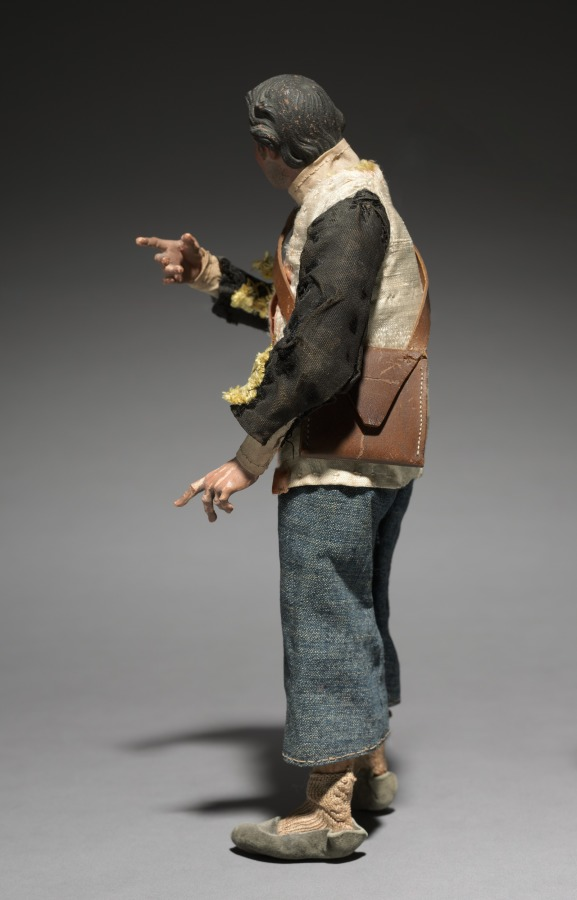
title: Figure from a Crèche: Standing Man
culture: Italy, Naples, late 18th-early 19th century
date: 1780–1830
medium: painted wood and terracotta with various textiles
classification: Sculpture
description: The practice of creating scenes of the Nativity for the home dates from the early 1700s in Italy, where people began to set up doll-like figures of about a foot or less in height. The custom was particularly popular in Naples around 1800, where crèche scenes (crèche means cradle, or crib) included many figures, whose heads and hands of painted terracotta, stuffed cloth bodies, and clothing adapted from contemporary local costumes gave them an amazingly realistic character. Representations of the birth of Jesus can be traced to the first few centuries of Christianity. Both living creatures and sculptural depictions of them were used from early times. By the late middle ages it was customary to create life-size figures of wood or stone, naturalistically painted, to represent the characters who participated in the events of Jesus's early life. These sculptures were then arranged in scenes illustrating one or both of the most important of these events, the Adoration of the Shepherds and the Adoration of the Magi-the three kings from the East who came to pay homage to the Christ child. Used in churches, these large figures were especially popular in Italy, Central Europe, Spain, and Portugal.